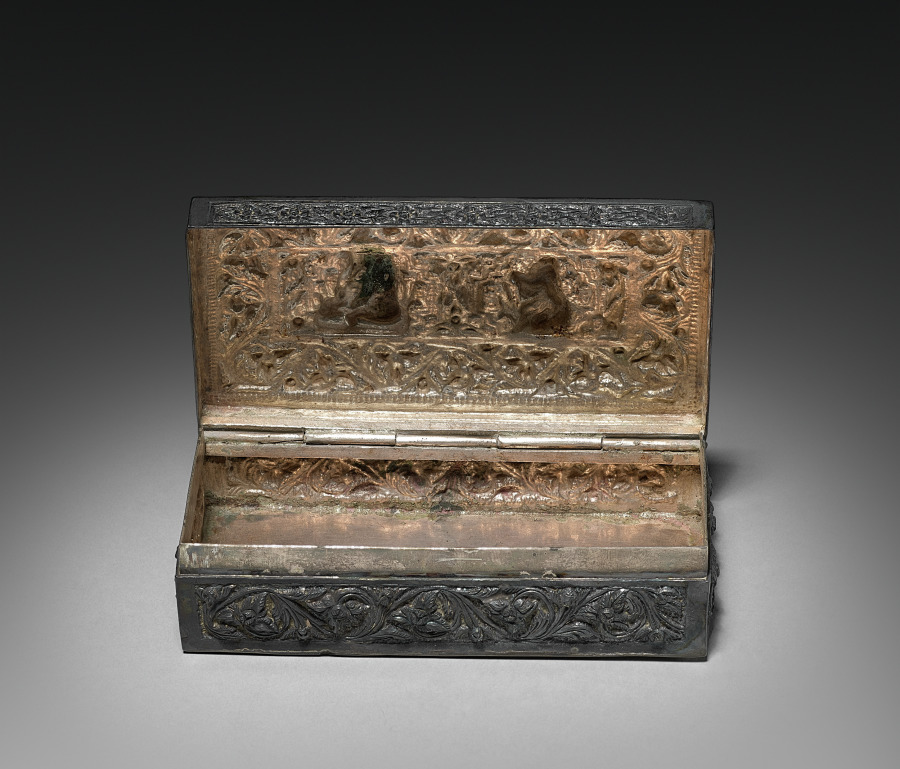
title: Rectangular Box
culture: Siam, 19th century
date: 1800s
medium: silver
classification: Metalwork